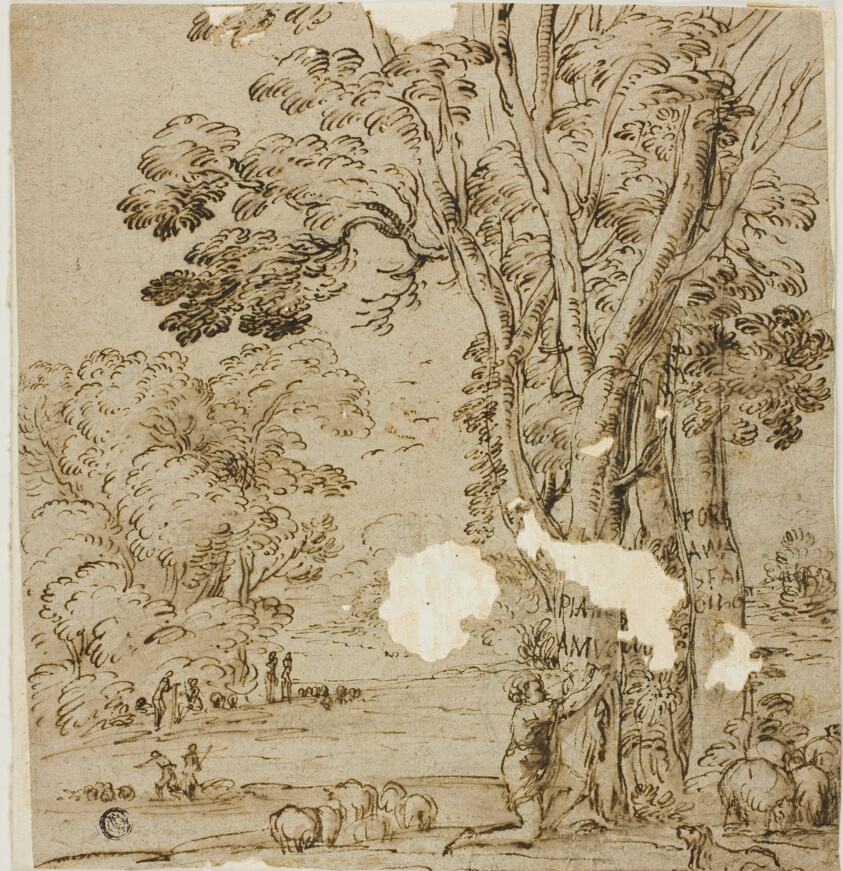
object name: Drawing and Watercolor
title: Shepherd Carving an Inscription on Tree Trunk with Figures and Sheep in Background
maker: Possibly Agostino Tassi (Italian, c.1580-1644); or Andrea Meldolla Schiavone (Italian, 1522-1564); or Pier Francesco Mola (Italian, 1612-1666; or the school of Titian (Italian, c. 1488-1576)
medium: Pen and brown ink, with brush and brown wash, with traces of graphite, on blue laid paper (faded to brown), laid down on ivory laid paper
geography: Italy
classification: drawings (visual works); prints and drawing